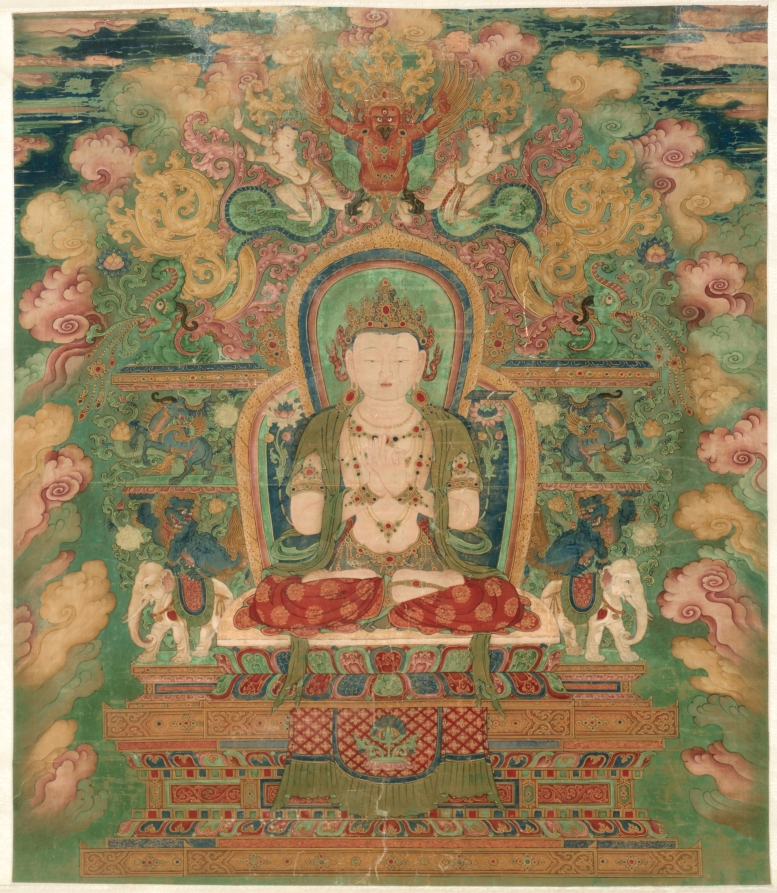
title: Manjushri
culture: China, Ming dynasty (1368–1644)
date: c. 1500–1550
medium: Hanging scroll, ink, color and gold on silk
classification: Painting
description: A Chinese artist's interpretation of an Indo-Nepalese throne surrounds the white figure of Manjushri, the bodhisattva of wisdom. Chinese textiles and jewels drape fluidly over the body, the red lower garment offering a contrast to the abundance of malachite green that dominates the composition. Swirling clouds of variegated hues around the periphery add to the mystical, almost magical mood of this iconic figure. His hands are in the gesture of imparting the Buddhist teachings, while his posture and expression reveal that wisdom can be perceived through the practice of yogic meditation.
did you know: The book on the lotus by the figure's left shoulder identifies him as Manjushri, the bodhisattva of wisdom.